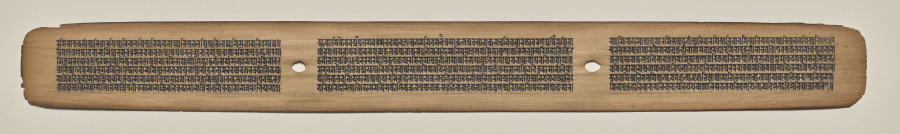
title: Text, Folio 18 (recto), from a Manuscript of the Perfection of Wisdom in Eight Thousand Lines (Ashtasahasrika Prajnaparamita-sutra)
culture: Eastern India, Bihar, Vikramashila Monastery. Painting: Nepal, Kathmandu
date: Sunday, September 14, 1119 (year 239 of the Newar Samvat in the month of Ashvina)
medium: gum tempera and ink on palm leaves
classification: Painting